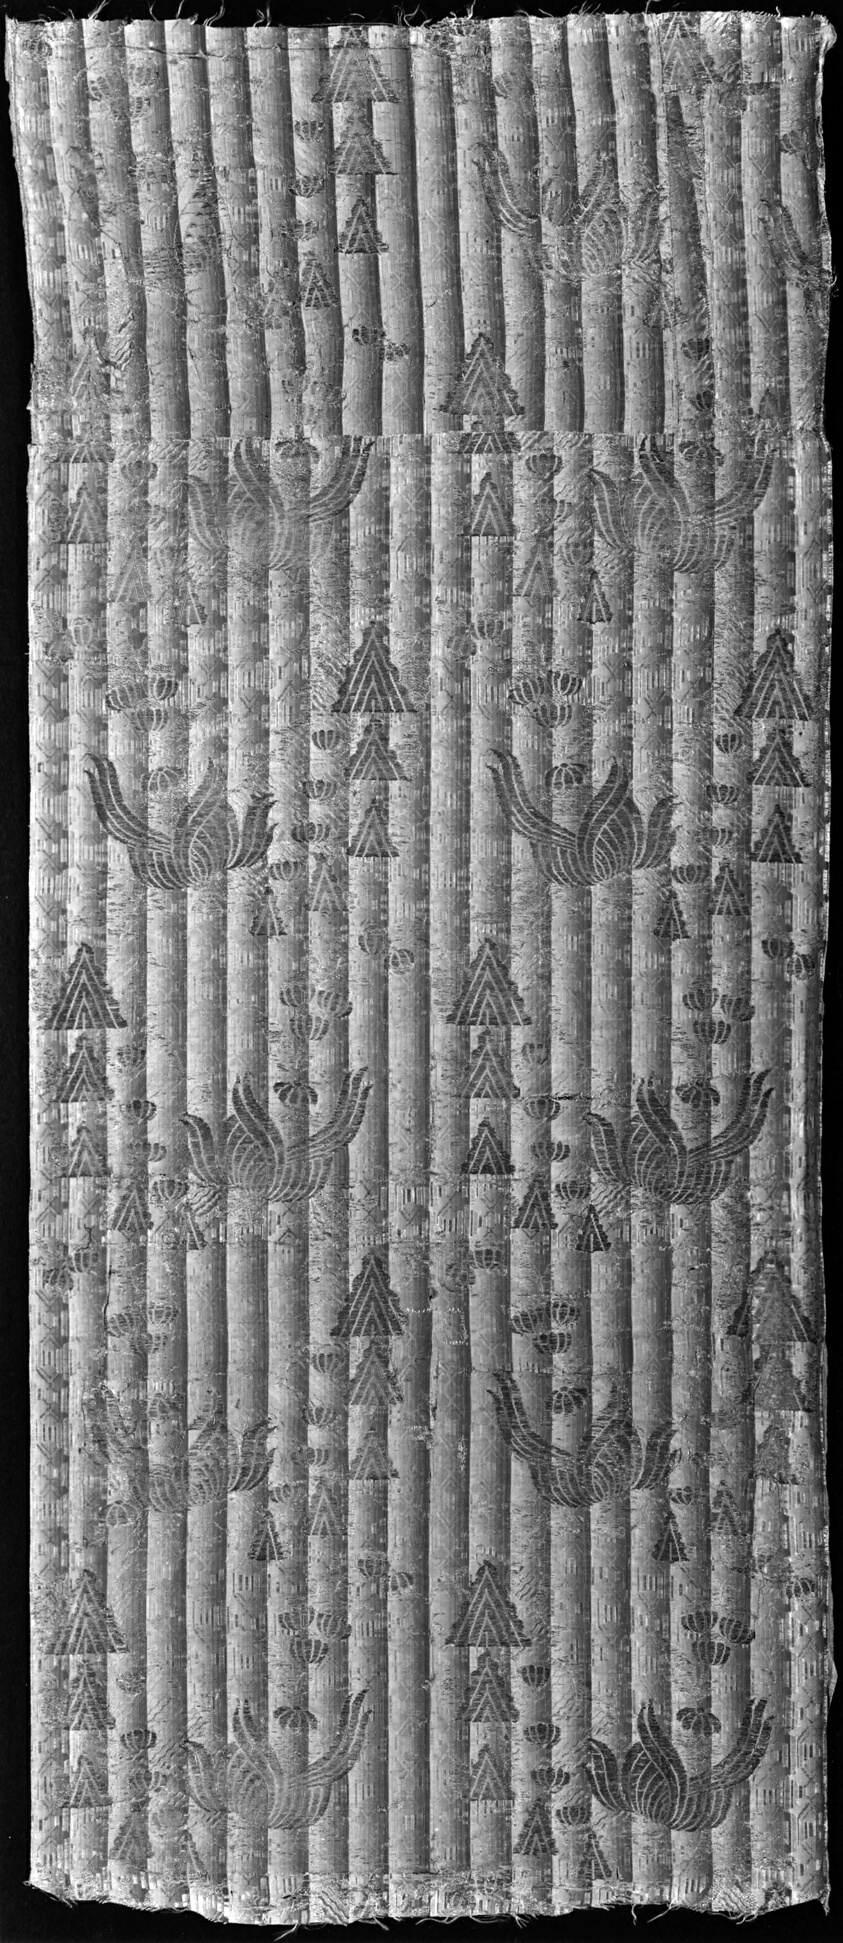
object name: Textile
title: Panel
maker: Possibly France (possibly for export)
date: 1725/75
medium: Silk, silvered-metal-strip-wrapped silk, warp-stripe plain weave with supplementary patterning wefts and supplementary brocading wefts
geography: France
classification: textile; weaving